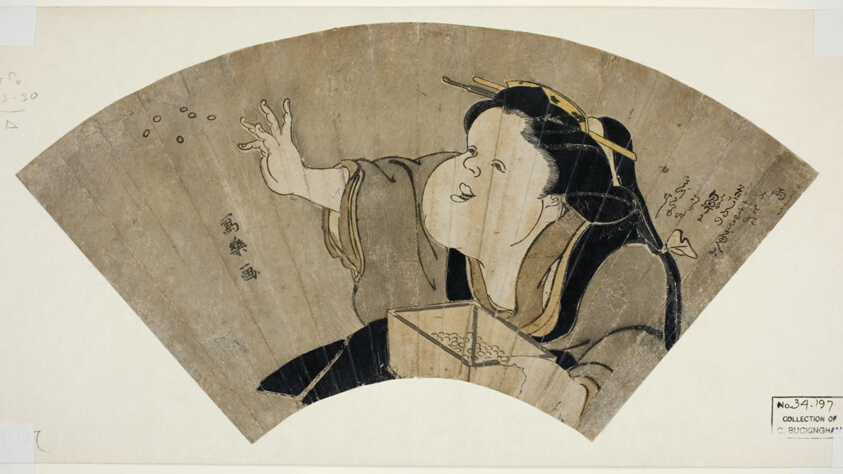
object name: Print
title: Otafuku Throwing Black Beans to Chase Away the Demons on New Year's Eve (Senmen Otafuku zu)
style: Japanese (culture or style)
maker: Toshusai Sharaku 東洲斎 写楽; Japanese, active 1794-95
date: 1794/95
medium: Fan print, stencil-printed color on paper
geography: Japan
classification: woodblock print; print; asian art